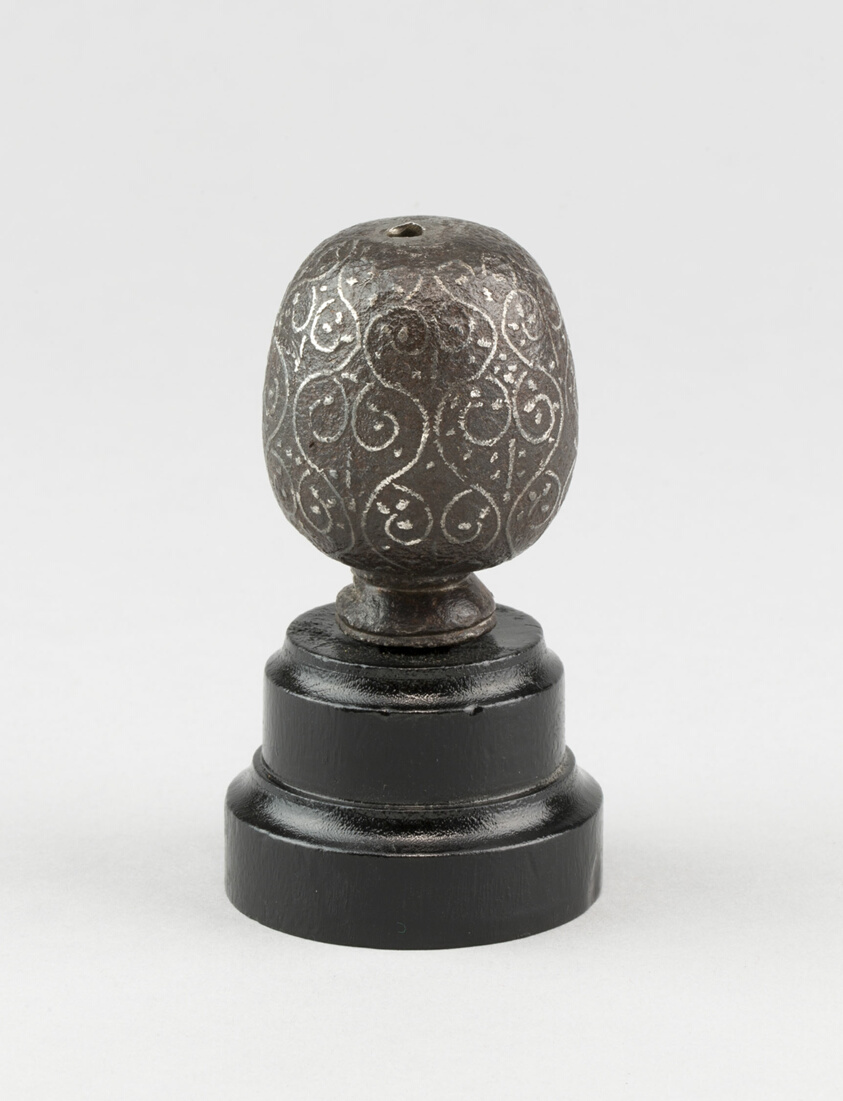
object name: Arms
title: Sword Pommel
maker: European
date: c. 1520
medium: Iron and silver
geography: Europe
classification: edged weapon-sword; arms; arms and armor